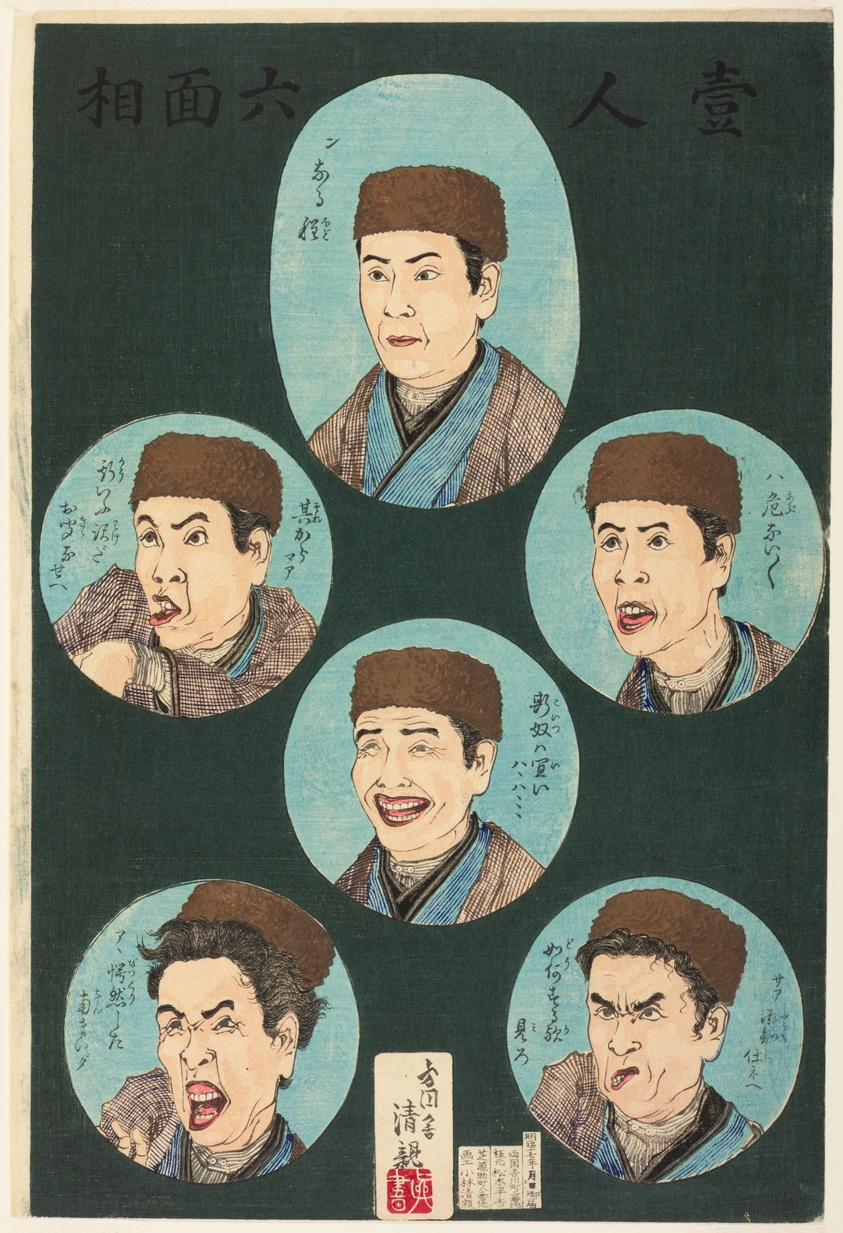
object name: Print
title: One Person, Six Expressions (Hitori rokumenso)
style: Japanese (culture or style)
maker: Kobayashi Kiyochika (Japanese, 1847-1915)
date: 1884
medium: Color woodblock print; oban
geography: Japan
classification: woodblock print; print; asian art